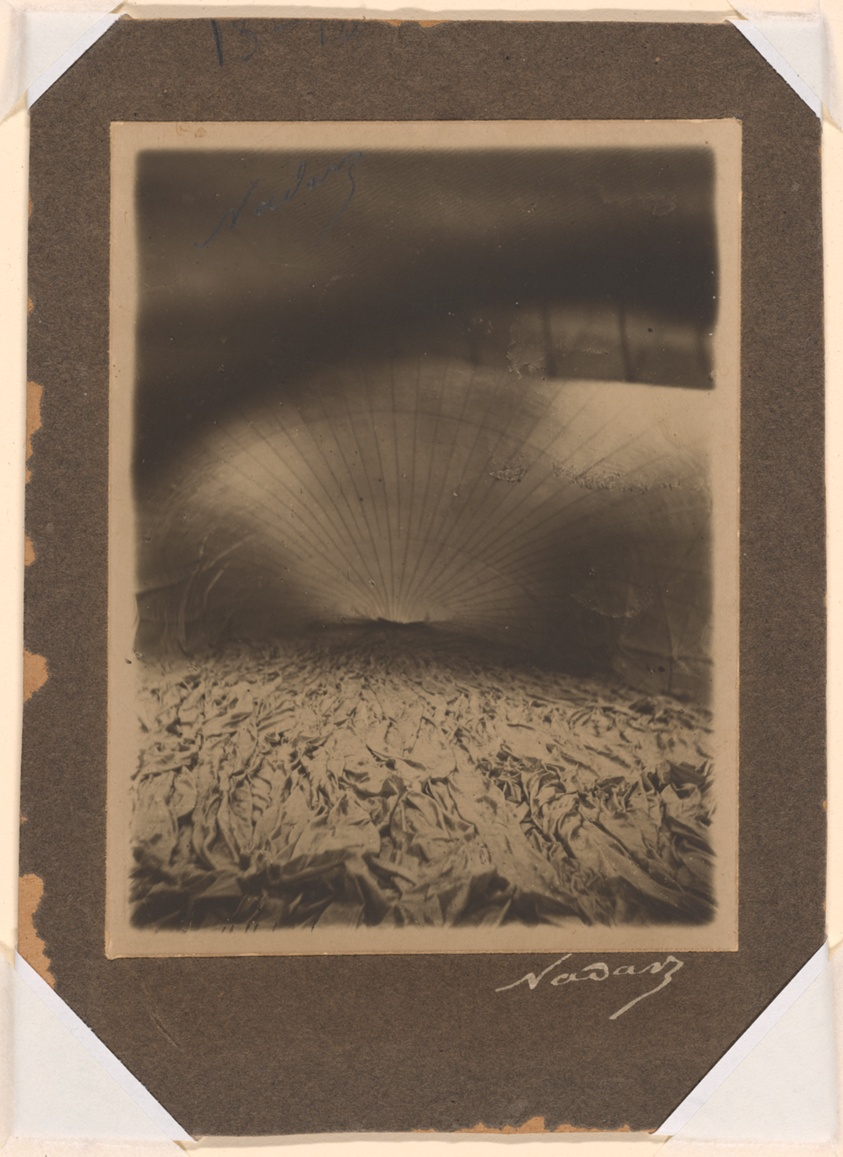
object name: Photograph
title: Interior of Le Géant Inflating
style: 19th century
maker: Nadar (Gaspard Félix Tournachon) (French, 1820–1910)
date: 1863, printed later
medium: Gelatin silver print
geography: France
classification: gelatin silver (developing-out-paper) pr; photographic process; photography; photograph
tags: Paris